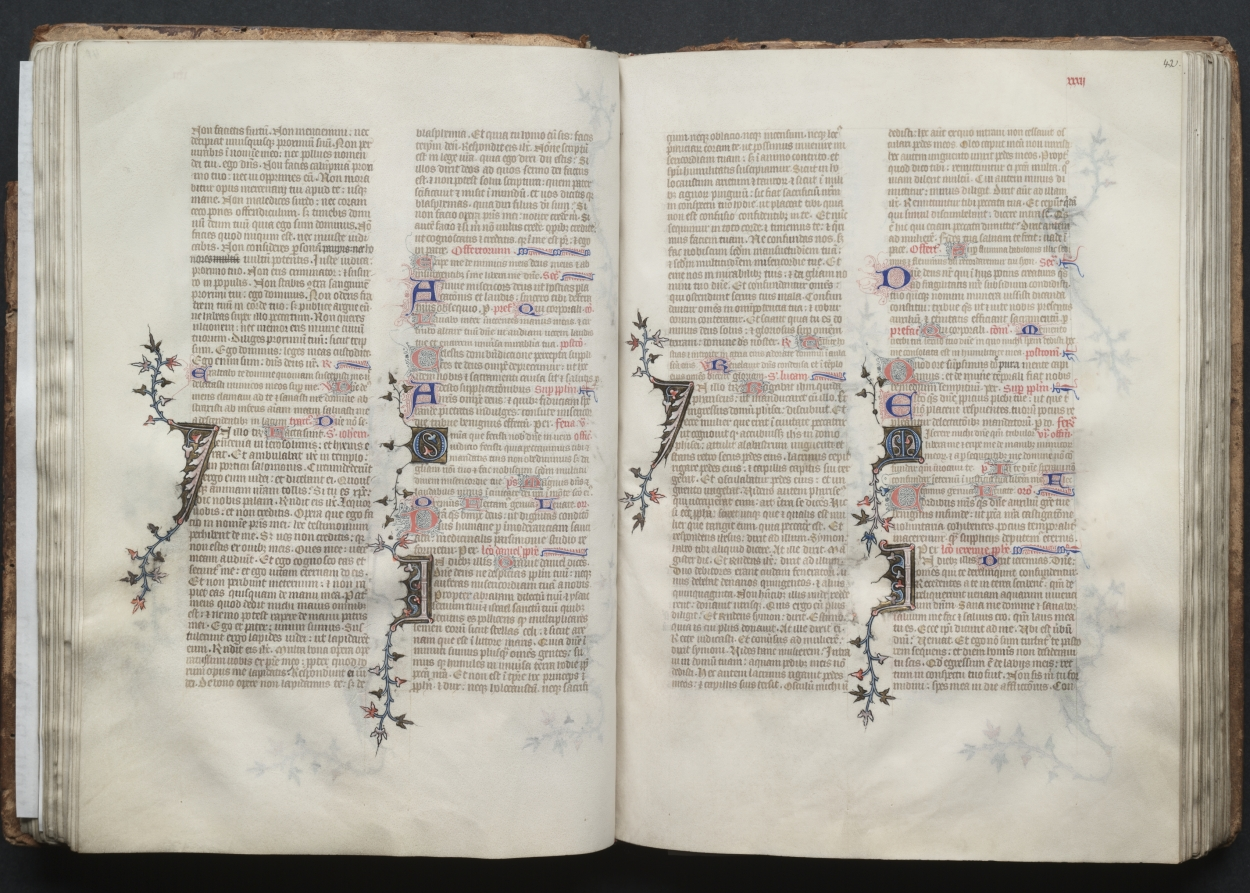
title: The Gotha Missal: Fol. 42r, Text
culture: France, Paris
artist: Master of the Boqueteaux (French)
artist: and Workshop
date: c. 1375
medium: ink, tempera, and gold on vellum; blind-tooled leather binding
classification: Bound Volume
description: The style and quality of this manuscript's decoration is typical of deluxe Parisian books made for aristocratic or royal patrons. Most of the book's decoration appears to be the work of the Master of the Boqueteaux, an artist active at the court of King Charles V (died 1380). His style was apparently shared by a number of book illuminators working in and around Paris. It is very possible that the Gotha Missal belonged to Charles V, but is not provable because the manuscript has no royal portraits and lacks a colophon. Given the book's magnificent decoration, however, it would seem that it was produced for a Valois prince, if not for the king himself. The manuscript receives its name from the German dukes of Gotha, its later owners.